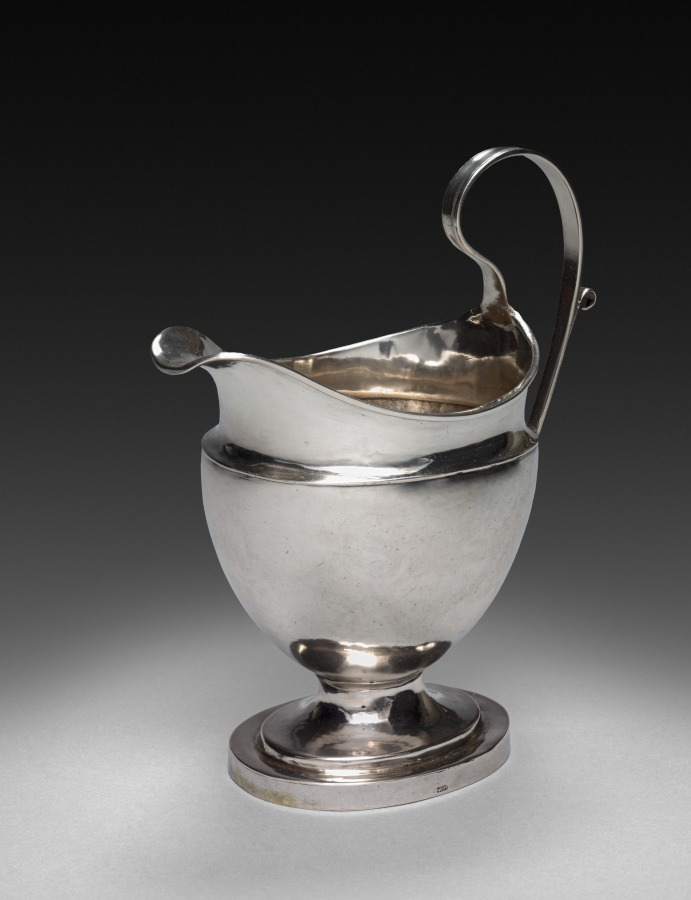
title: Cream Jug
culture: America, Pennsylvania, Philadelphia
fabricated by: William Haverstick (American, 1756–1823)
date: c. 1800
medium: silver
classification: Silver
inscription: engraved "MP" in bright-cut script on side to right of handle.